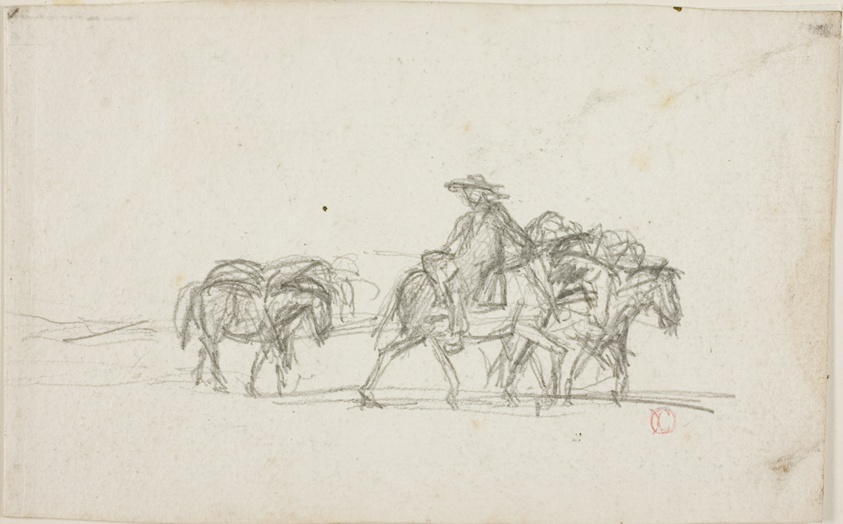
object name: Drawing and Watercolor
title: Study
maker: Charles François Daubigny (French, 1817-1878)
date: c. 1850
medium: Graphite on ivory wove paper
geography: France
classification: graphite; drawings (visual works); prints and drawing